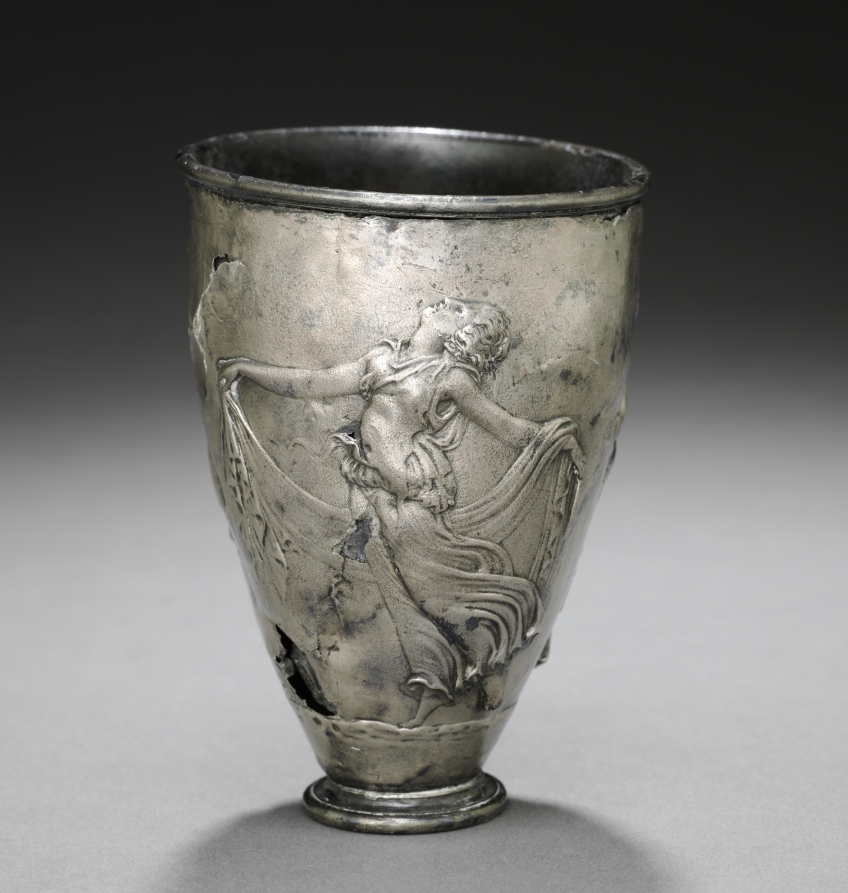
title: The Vicarello Goblet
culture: Italy, Vicarello (ancient Aquae Apollinares), Roman, Augustan period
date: 25 BCE–25 CE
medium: silver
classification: Metalwork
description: This masterpiece of the Roman silversmith’s art is exquisitely worked in relief. The multifigure scene centers on a rustic shrine of the ithyphallic fertility god Priapus, son of Dionysos. He takes the form of a stylized boundary marker atop a column, where a woman seems to have brought him to life by touching him. To the left sits a table with votive offerings to the god. Flanking the shrine are a satyr and maenad, dancing ecstatically.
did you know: This silver cup was found north of Rome at Vicarello (ancient Aquae Apollinares), probably in 1862.